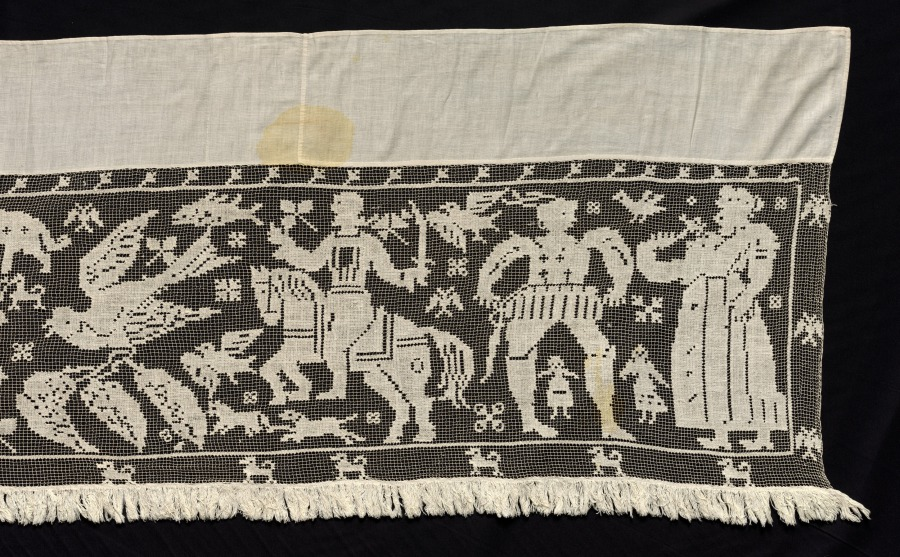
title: Border with Mounted and Standing Figures, Chariots, and Animals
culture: Spain ?, 1800s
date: 1800s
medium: Bleached linen (est.): needle lace, filet/lacis (knotted ground and darned in two directions)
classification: Lace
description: Animals viewed in profile, some with their legs raised, indicate movement, such as a parade or procession. The human figures are also shown in profile, with the exception of the central figure riding a chariot, who is shown frontally. There is one figure riding a donkey, with another on horseback, holding a sword. On the far right, a man and woman appear engaged in conversation. Meanwhile, various animals fill the space defying all rules of perspective, with the bird in the center appearing larger than some of the humans.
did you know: The word lace derives from the Latin laqueus, meaning noose.